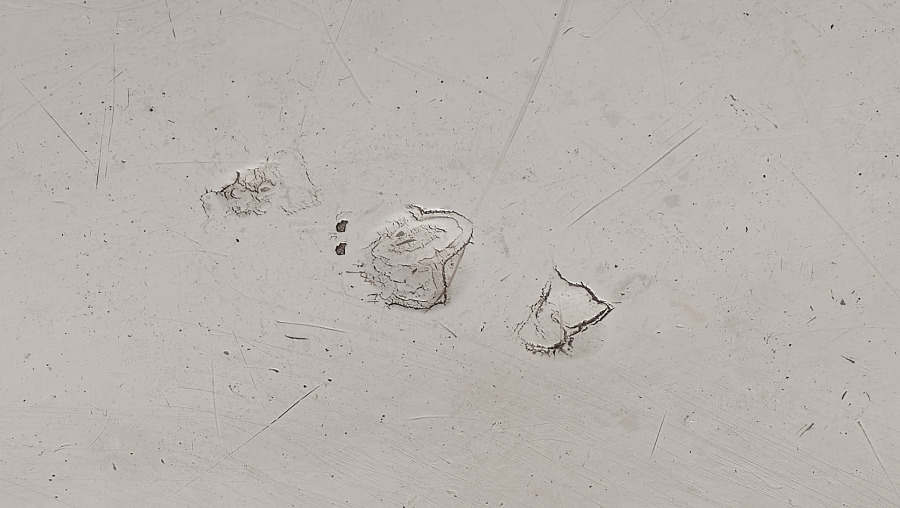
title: Stand for a Covered Tureen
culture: France, Paris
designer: Juste-Aurèle Meissonnier (French, 1695–1750)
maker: Pierre-François Bonnestrenne (French)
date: 1735–38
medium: silver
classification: Silver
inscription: engraved Meissonnier signature.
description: See entry for cover record 1977.182.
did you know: The langoustine, pigeon, and vegetables were cast using real examples giving the silver copies lifelike detail and appearance.